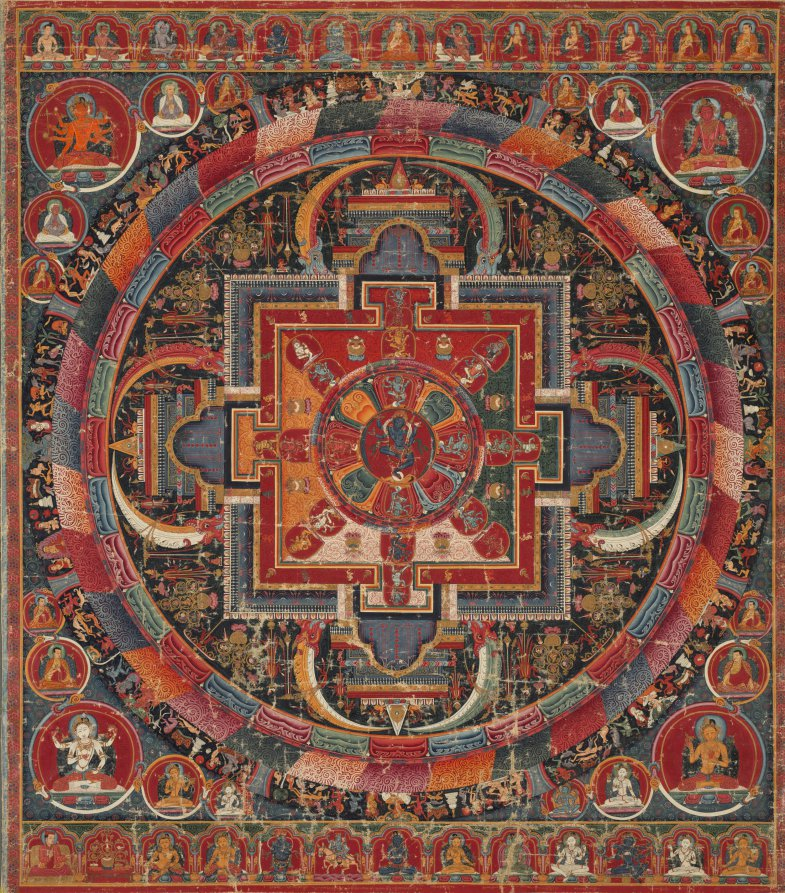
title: Twenty-three Deity Nairatma Mandala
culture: Central Tibet, Sakya-affiliated monastery, 14th century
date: c. 1375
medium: Gum tempera, ink, and gold on cloth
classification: Painting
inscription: The inscription along the bottom says: Twenty-three deity Nairatma Mandala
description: One of the main types of imagery in tantric Buddhist art is the mandala, a two-dimensional diagram of the realm of an enlightened being. This mandala depicts the palace of Nairatma, who dances in the center surrounded by her entourage. Using the painting as a guide, the tantric practitioner in meditation mentally projects the two-dimensional plan into three-dimensional space and enters into it. The outermost ring contains depictions of the cremation grounds, where corpses are being burned and consumed, as well as tantric yogis and masters who work there in order to understand the impermanence of the body, defeat their fear of death, and overcome irrational aversions to impure aspects of life. Virupa is depicted twice, always pointing to arrest the sun with his raised left hand. He sits among the row of lineage masters along the top edge, and is also depicted in the topmost segment of the ring of cremation grounds, being served a cup of liquor. Along with lineage masters at the top of this impressive painting, bodhisattvas and important masters are depicted in the spandrels, each identified by an inscription.